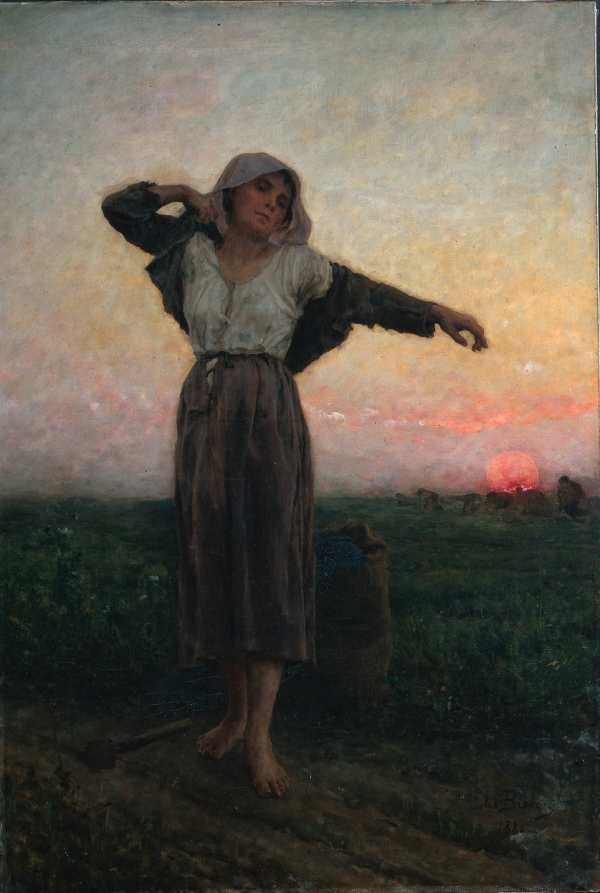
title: The Tired Gleaner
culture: France, 19th century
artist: Jules Breton (French, 1827–1906)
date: 1880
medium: oil on fabric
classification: Painting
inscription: Signed in black paint lower right corner: Jules Breton 1880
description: Gleaning—or picking up what little grain remains after a wheat field has been harvested—was usually the job of the poor, especially women and children. Breton shows a single gleaner stretching against a backdrop of the setting sun, while behind her others still labor in the field. Her bare feet and worn, simple clothing immediately identify her as a peasant. At the same time, however, her expansive gesture and the subdued tones of her skin and clothes link her to the surrounding landscape, both visually and symbolically. This painting not only suggests the hardships of peasant life, but also the grand link between humanity and the land. Like many of his successful contemporaries, Breton met demand for his paintings by copying and making variations of his own works. This picture is similar to a larger, more famous painting that was exhibited in the Paris Salon of 1880. The Cleveland collector Hinman H. Hurlbut, who bought this canvas from the artist, probably commissioned Breton to make this smaller variation of the larger painting.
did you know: Breton felt a sense of connection with peasant life, growing up in a small village of rural workers; however, his father's standing as a property manager to a duke allowed Breton to receive a classical arts education.